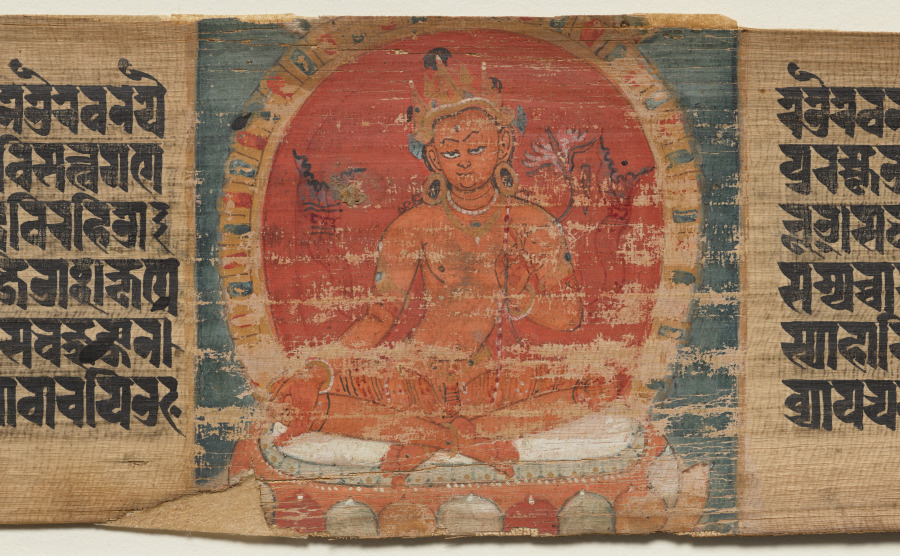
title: Text, folio 186 (recto), from a Manuscript of the Perfection of Wisdom in Eight Thousand Lines (Ashtasahasrika Prajnaparamita-sutra)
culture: Eastern India, Bihar, Vikramashila Monastery. Painting: Nepal, Kathmandu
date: Sunday, September 14, 1119 (year 239 of the Newar Samvat in the month of Ashvina)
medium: Gum tempera and ink on palm leaf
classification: Painting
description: This manuscript, consisting of 188 double-sided folios, was calligraphed by a scribe at a monastery in northeastern India, commissioned by a monk from Nepal. Judging from the style of the paintings, they are the work of Nepalese artists.